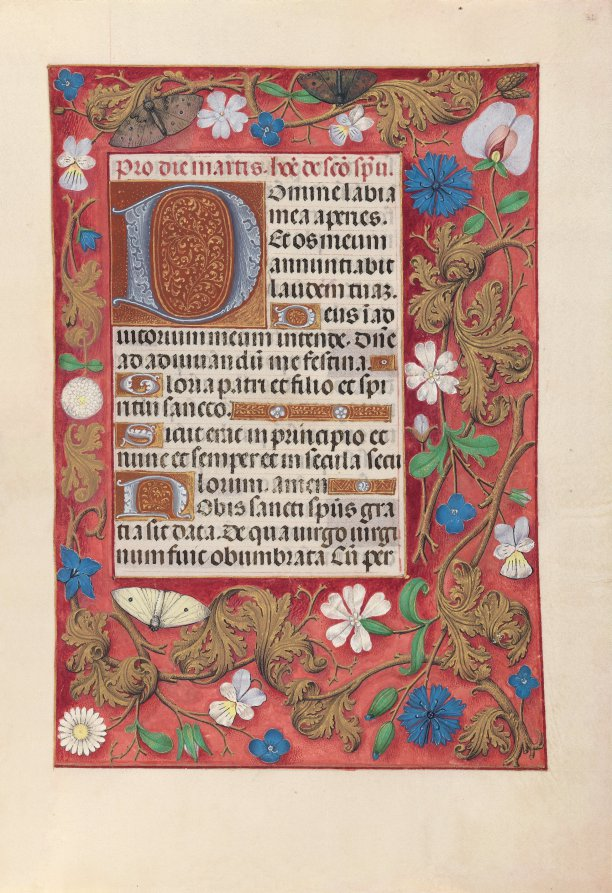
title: Hours of Queen Isabella the Catholic, Queen of Spain: Fol. 32r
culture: Flanders, Ghent and Bruges, late 15th century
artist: Master of the First Prayerbook of Maximillian (Flemish, c. 1444–1519)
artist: and Associates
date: c. 1500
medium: ink, tempera, and gold on vellum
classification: Bound Volume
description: A great lover of Flemish art, Queen Isabella treasured her many devotional books. This deluxe manuscript was created for her private devotions by highly organized and distinctly talented manuscript painters active in Ghent and Bruges. The Ghent-Bruges school represents the culmination of Flemish book painting, whose main features were the use of rich colors, illusionistic effects, a love of landscape, and a strong sense of visual narrative. Manuscripts produced by this circle of artists are renowned for their border decoration featuring a rich variety of realistically painted flowers, scrolling acanthus leaves, birds, and butterflies.